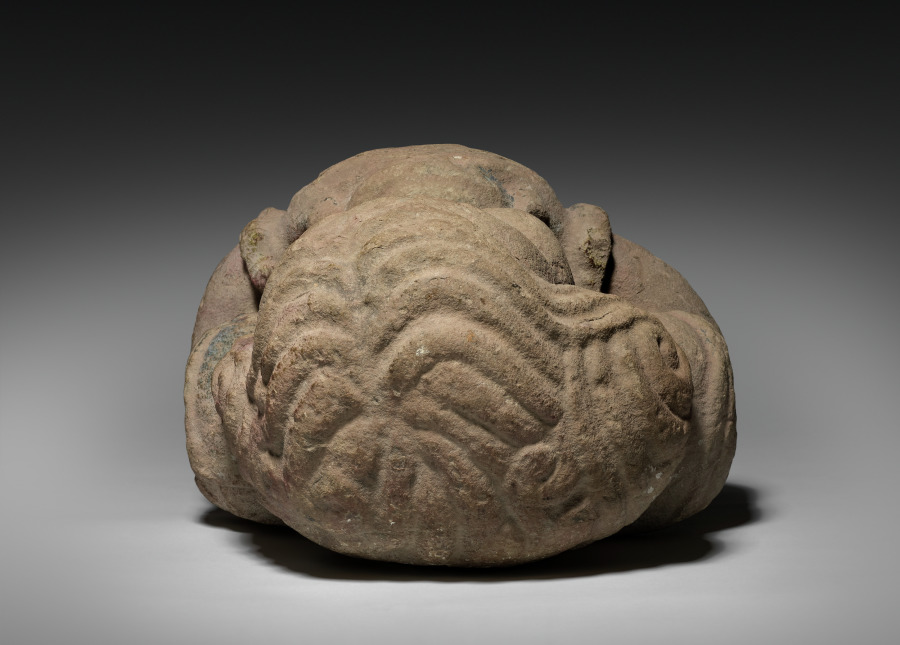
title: Shivagana Blowing Conch Shell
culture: India, Sarnath, Gupta Period, 5th Century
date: c. 400s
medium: stone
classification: Sculpture